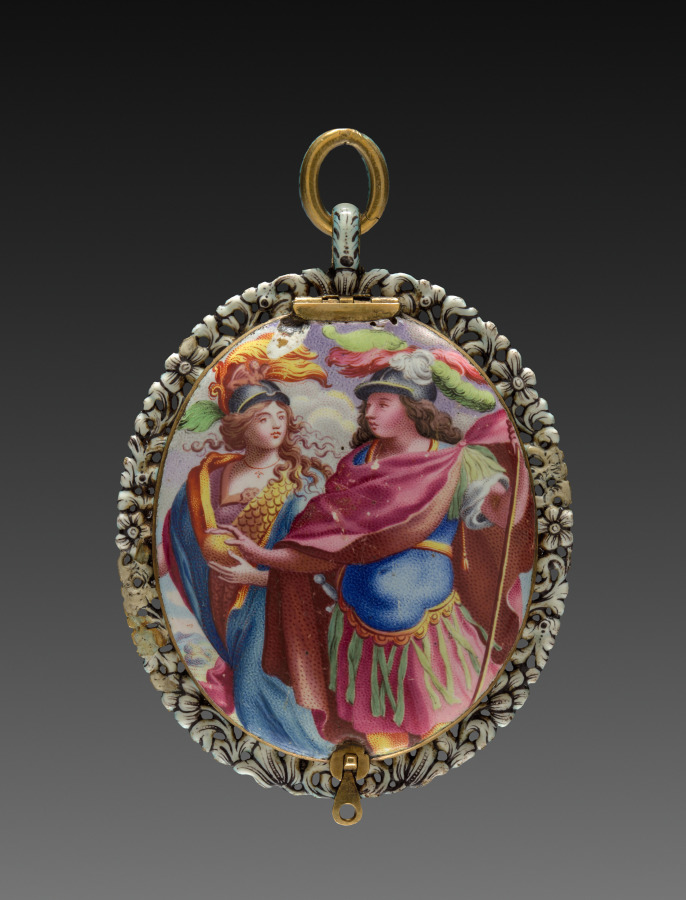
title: Locket Pendant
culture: Germany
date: 1600s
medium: enamel on gold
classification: Jewelry